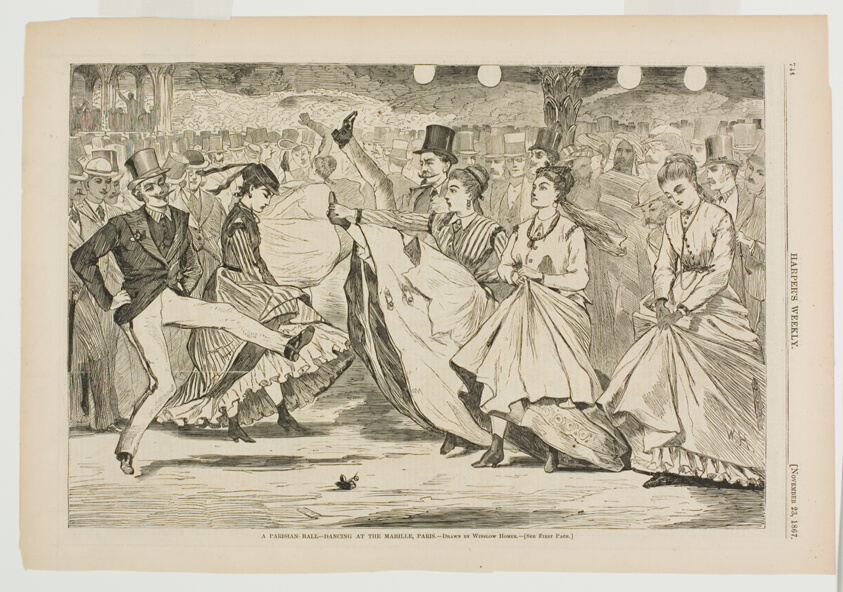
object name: Print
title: A Parisian Ball—Dancing at the Mabille, Paris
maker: Winslow Homer (American, 1836-1910); published by Harper's Weekly (American, 1857-1916)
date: published November 23, 1867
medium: Wood engraving on paper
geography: United States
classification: wood engraving; print; prints and drawing